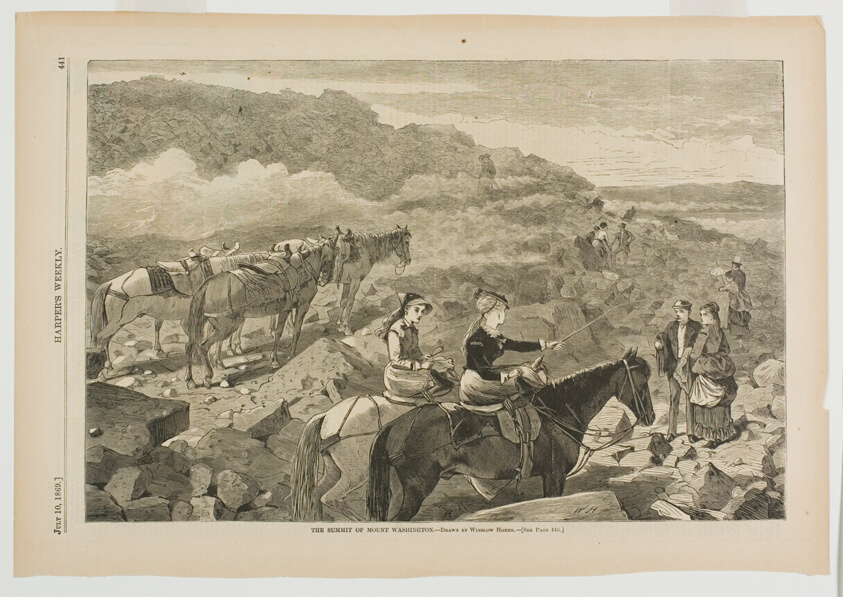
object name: Print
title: The Summit of Mount Washington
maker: Winslow Homer (American, 1836-1910); published by Harper's Weekly (American, 1857-1916)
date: published July 10, 1869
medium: Wood engraving on paper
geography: United States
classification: wood engraving; print; prints and drawing